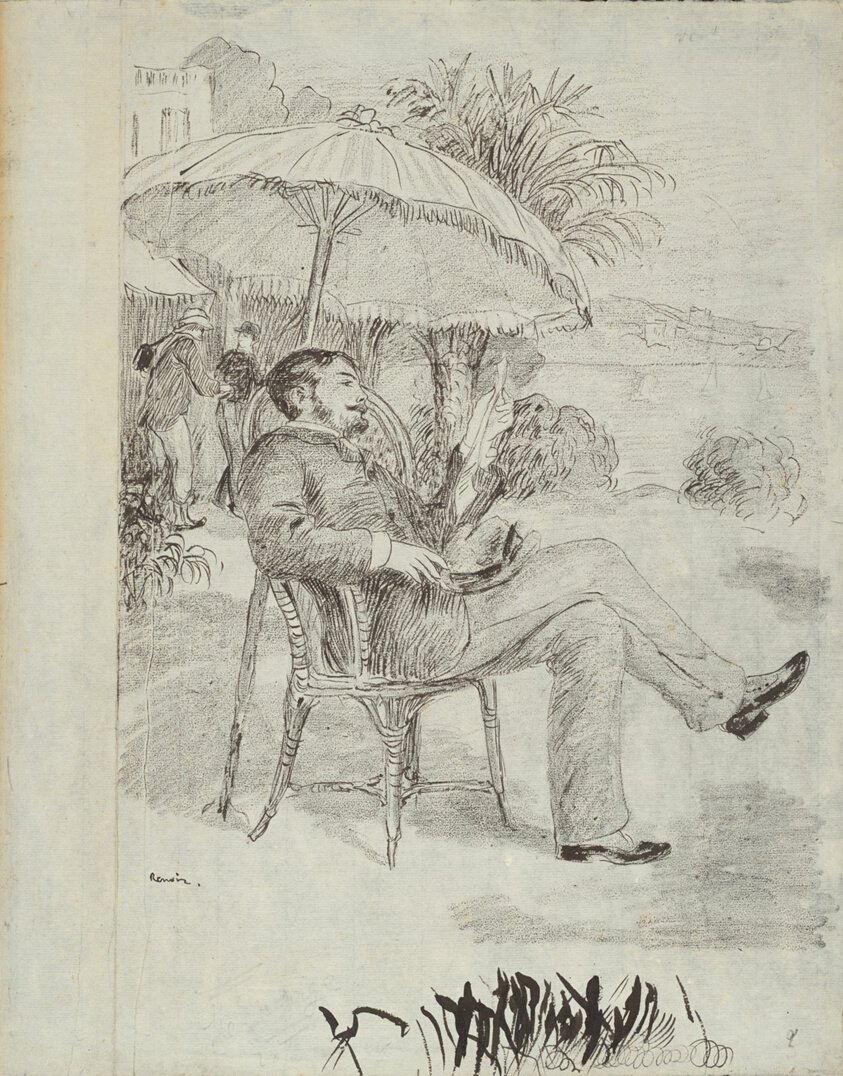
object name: Drawing and Watercolor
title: On the Terrace of a Hotel in Bordighera: The Painter Jean Martin Reviews His Bill (Illustration for Edmond Renoir’s “L’étiquette”)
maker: Pierre Auguste Renoir; French, 1841-1919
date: 1881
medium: Black conté crayon over pen and brush and black ink on ivory laid paper (discolored to cream)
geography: France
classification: pen and ink drawings; drawings (visual works); prints and drawing